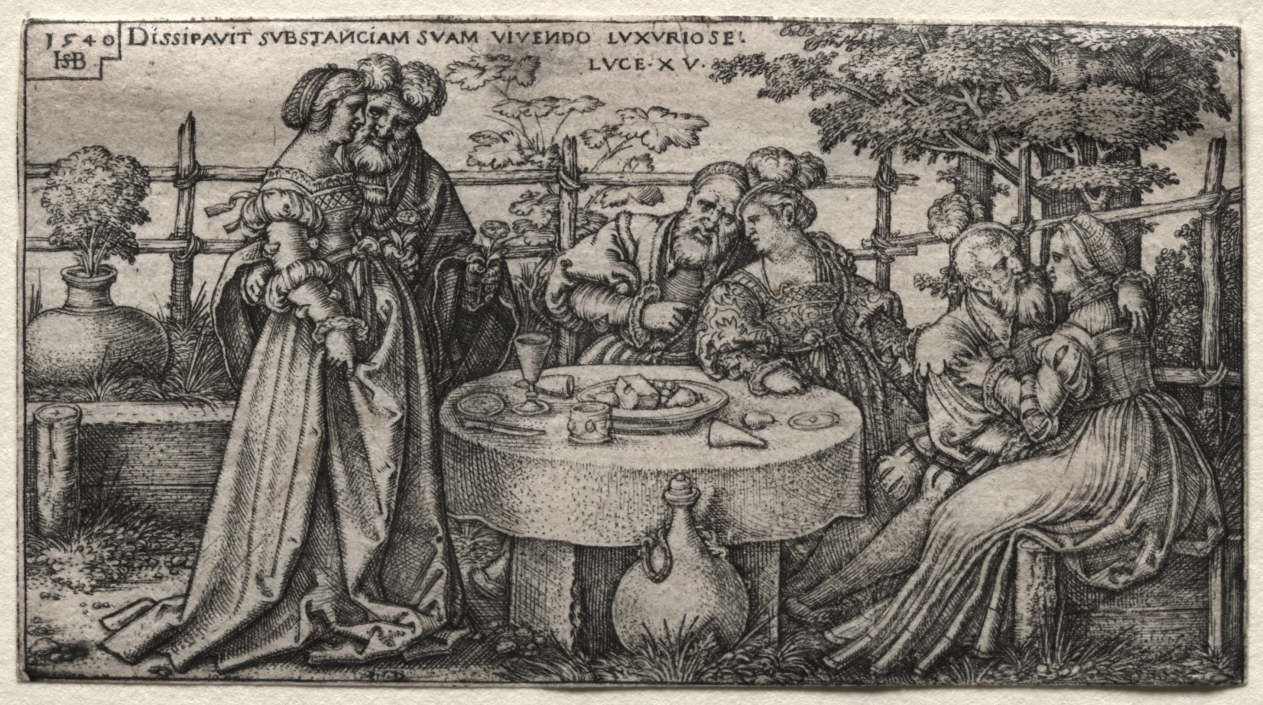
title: The Prodigal Son: Wasting His Fortune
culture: Germany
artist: Hans Sebald Beham (German, 1500–1550)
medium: engraving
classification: Print